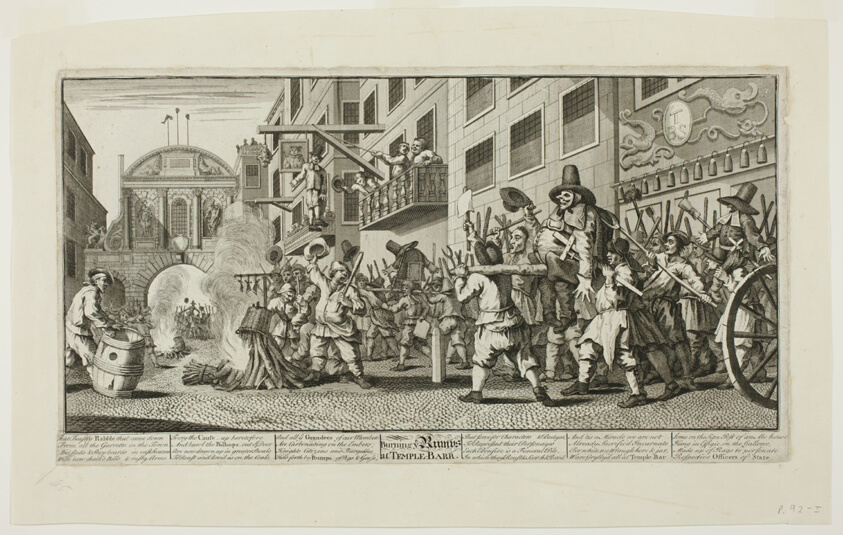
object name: Print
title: Burning the Rumps at Temple Bar, plate eleven from Hudibras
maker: William Hogarth (English, 1697-1764)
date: February 1725/26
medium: Engraving in black on cream laid paper edge mounted on cream wove paper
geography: England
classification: engraving; prints and drawing; print; etching